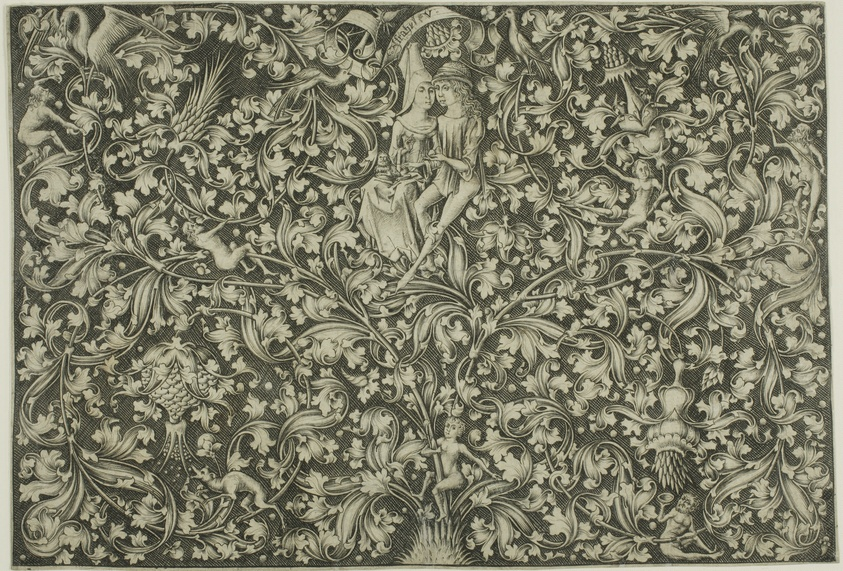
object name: Print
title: Ornamental Panel With Two Lovers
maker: Israhel van Meckenem the Younger; German, c. 1440/45-1503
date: 1480–90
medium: Engraving printed in black, on ivory laid paper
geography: Germany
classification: engraving; print; prints and drawing